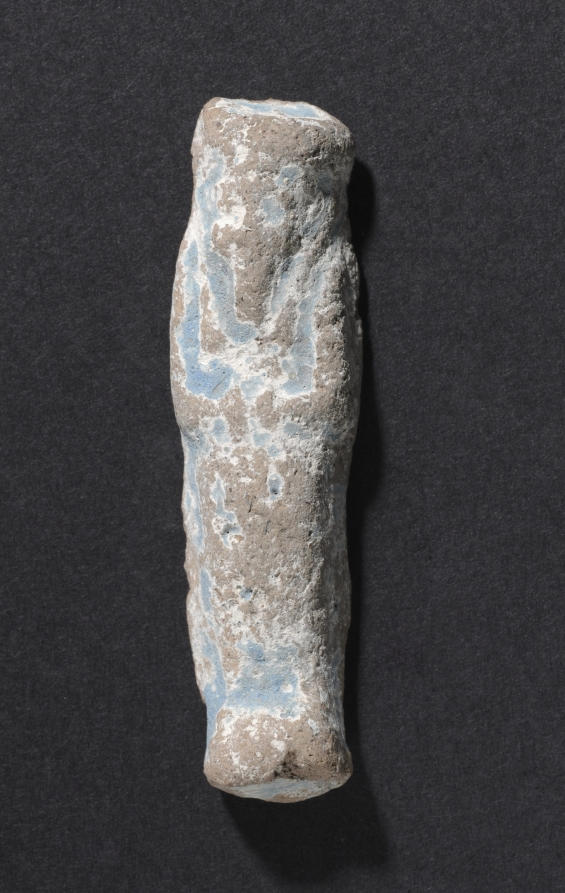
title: Shawabty of Ditamenpaankh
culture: Egypt, Late period (715–332 BCE), Dynasty 25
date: 715–656 BCE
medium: terracotta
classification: Funerary Equipment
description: High demand for shawabtys in the Late Period, a time when as many as 400 or more shawabtys were placed in the tomb with the deceased, gave rise to a specialized container for storing them: the shawabty box. This example is inscribed for the lady of the house, Ditamenpaankh, and was probably one of a pair originally made for her. The single-masted boat on the box's lid is perhaps an allusion to the pilgrimage of the deceased to the holy city of Abydos, the cult city of Osiris, king of the dead. The shawabtys inside are crude, mass-produced examples cast in an open mold. Made of terracotta, their blue paint imitates more costly shawabtys made of faience. As for the shawabty spell, it has been removed from its traditional location on the shawabty's front and relocated onto the sides of box, where it needed only to be written once, thus expediting production.